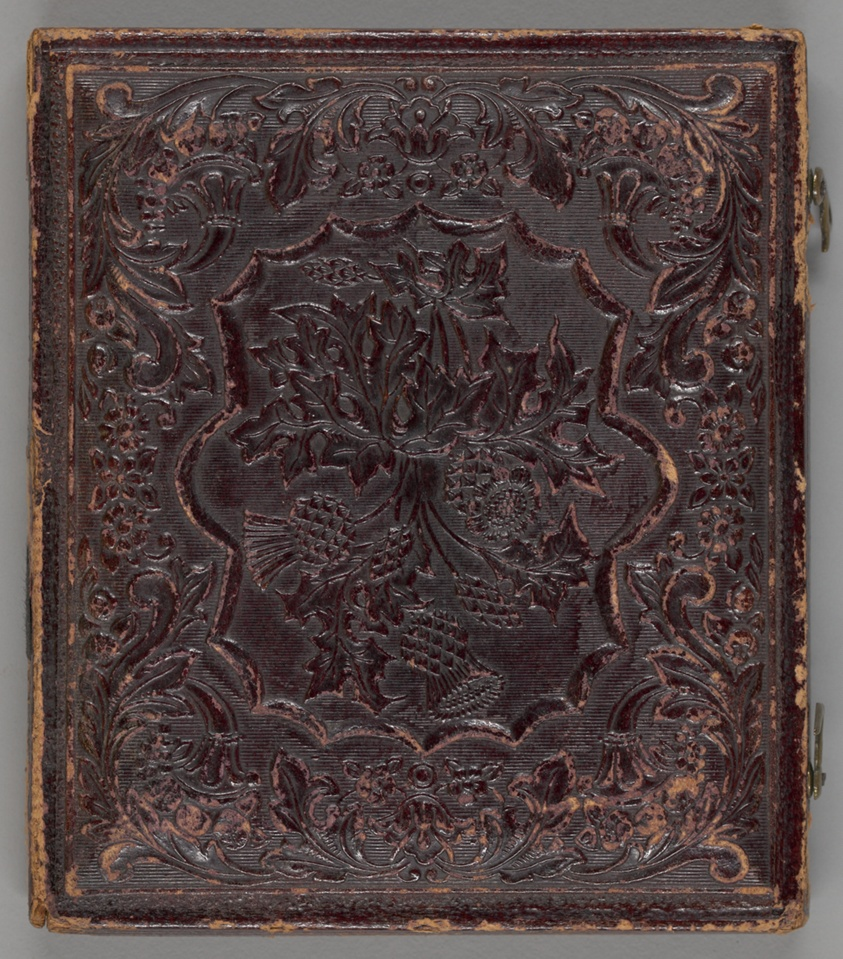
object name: Photograph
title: Untitled (Young Girl)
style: 19th century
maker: Artist unknown; 19th century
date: 1839/99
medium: Daguerreotype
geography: Unknown Place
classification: daguerreotype; photographic process; photography; photograph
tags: portraits, portraits: female subject, photography, formal portraits, portraits: child subject